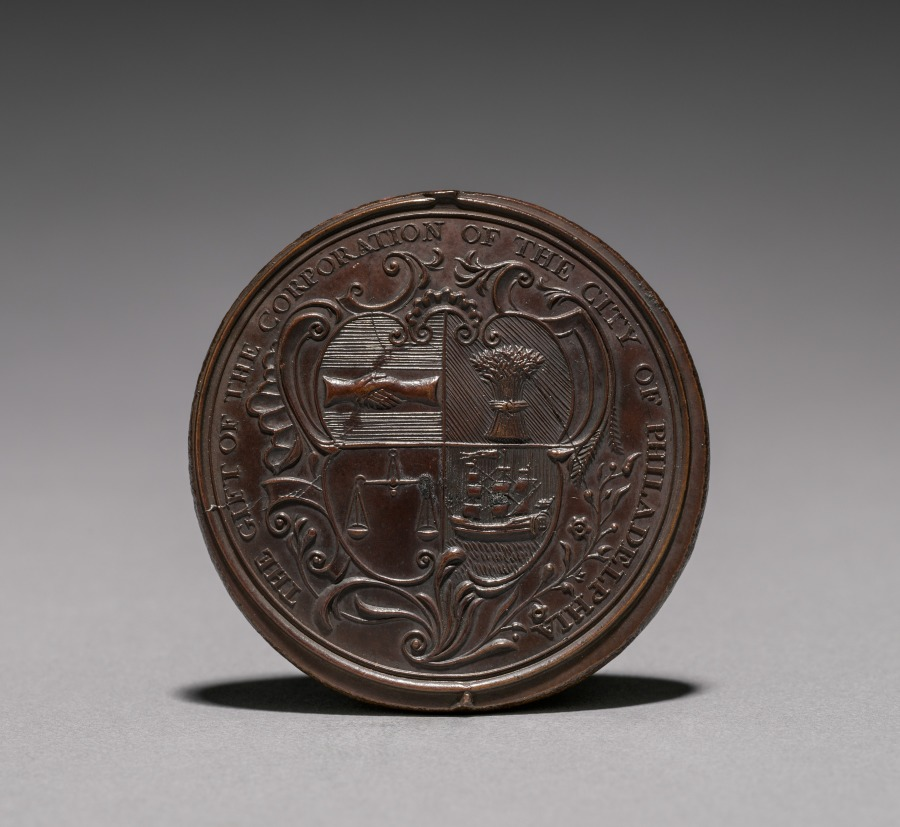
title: Medal: Commemorating the Destruction of Kittanning by Col. Armstrong, 8 September 1756 (obverse)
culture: America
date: 1756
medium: bronze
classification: Metalwork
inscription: The gift of the Corporation of the City of Philadelphia.